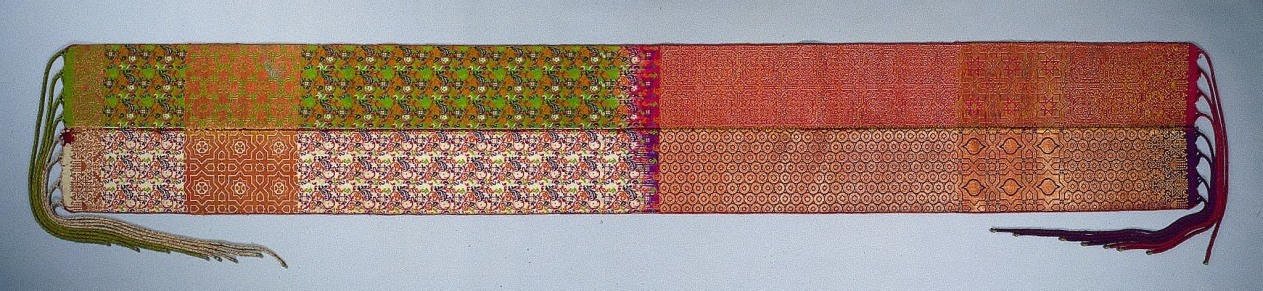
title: Belt (Hizam)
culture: Africa, North Africa, Morocco, Fes, Moroccan weaver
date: 1800s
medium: Silk, dye, metal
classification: Textile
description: Elaborate wedding sashes woven in Fez, Morocco, are distinctive for their multiple colors, designs, and uses. Folded lengthwise, they are wrapped around the waist so that the colors and designs coordinate with the attire worn during and after a wedding. Typically, the colors vary on each half although the designs are the same. Luxury textiles with elaborate patterns were woven on large looms called drawlooms that automatically repeated designs. The weaver operated the structure, inserting horizontal wefts, while the drawboy activated the programmed pattern. However, this wedding sash has ten programmed designs, which required considerable expertise.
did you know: Women sometimes added starch to stiffen these belts.